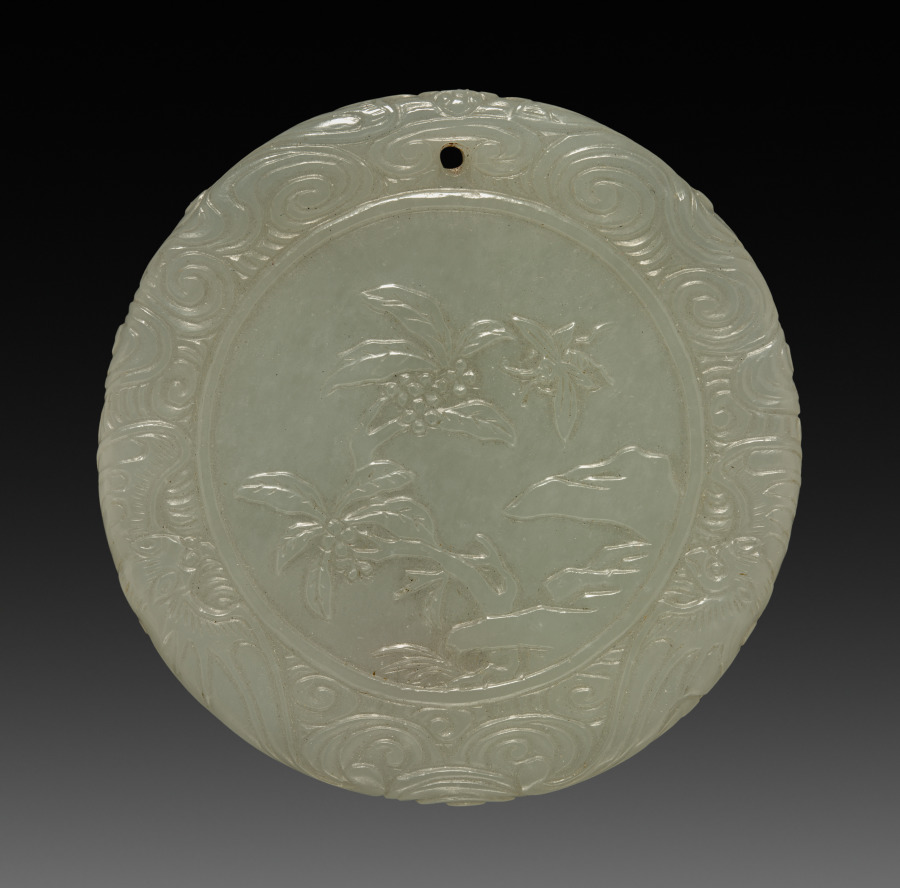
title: Circular Pendant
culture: China, Qing dynasty (1644–1911), Qianlong reign (1736–95)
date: 1735–95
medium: jade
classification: Jade